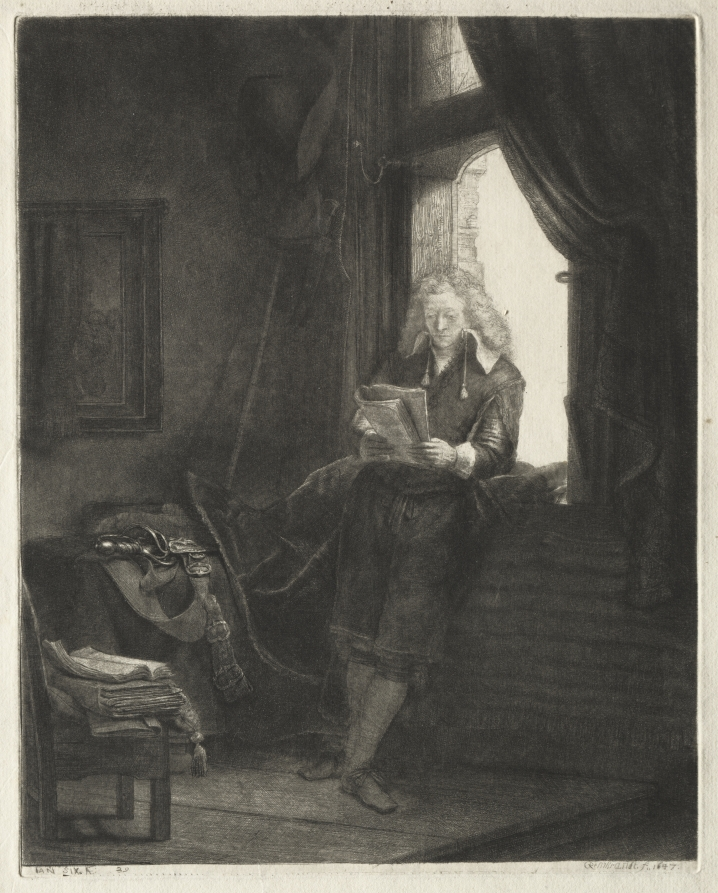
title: Jan Six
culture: Netherlands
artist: Rembrandt van Rijn (Dutch, 1606–1669)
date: 1647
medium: etching, drypoint, and engraving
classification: Print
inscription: lower left, in plate: IAN SIX. Æ 29 ; lower right, in plate: Rembrandt. f.. 1647. ; lower left, in pencil: B. 285 III / H. 228 III ; across bottom, in graphite: Burgomaster Jan Six (From the Six collection, Amsterdam, October 1928)